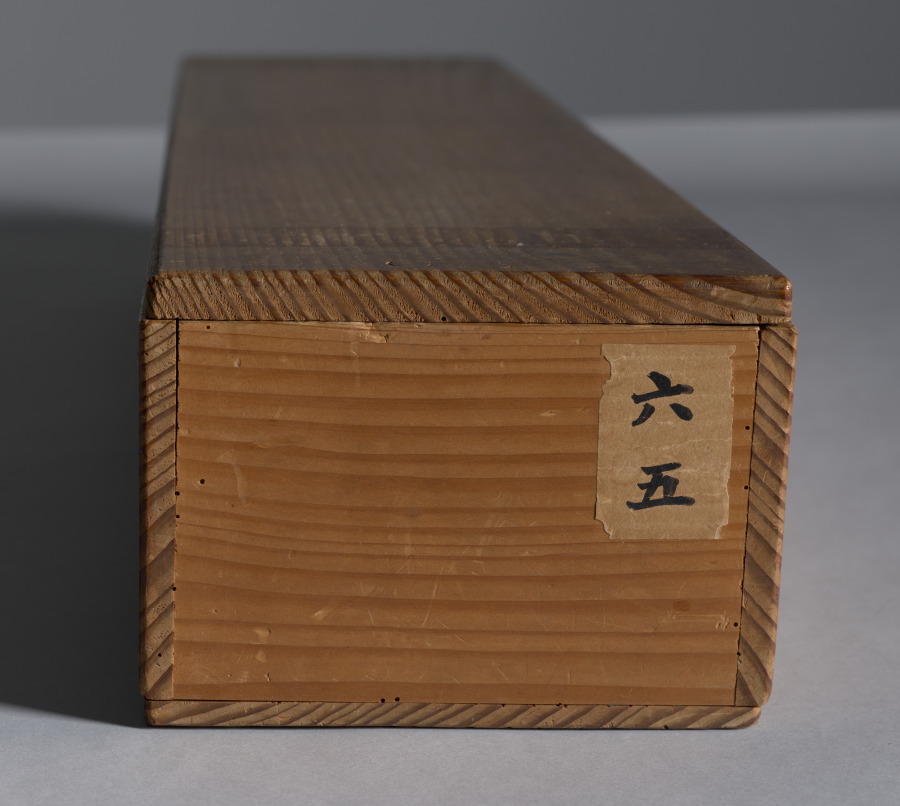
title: Landscapes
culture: Japan, Edo period (1615–1868)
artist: Unkoku Tōyo (Japanese, 1612–1688?)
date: mid- to late 1600s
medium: pair of hanging scrolls; ink and light color on paper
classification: Painting